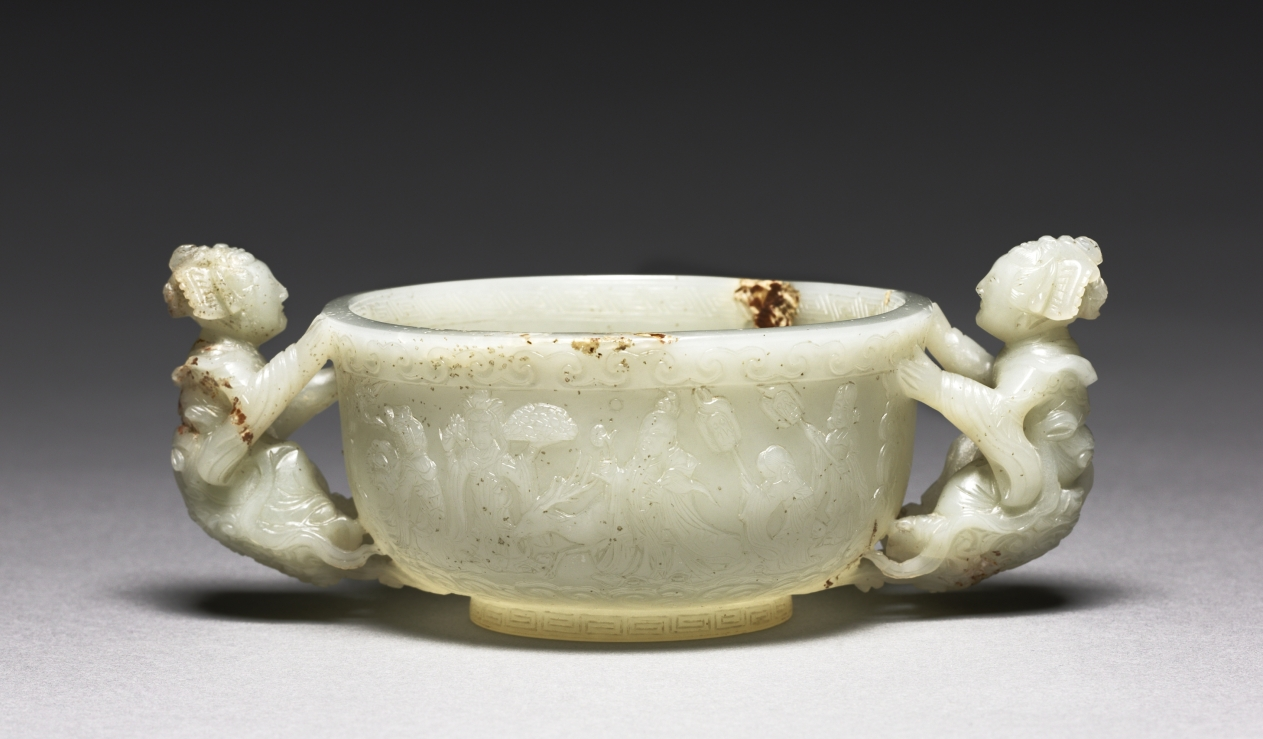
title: Cup with Daoist Figures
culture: China, Qing dynasty (1644–1911), Qianlong period (1736–95)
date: 1736–95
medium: Pale greenish-white jade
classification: Jade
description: During the Qing dynasty, Suzhou’s best products were sent north to the capital. Those that met imperial approval were sometimes graced with Qianlong’s mark, added by calligraphers and jade workers at court. The lack of a Qianlong mark on the Cleveland cup suggests that it might not have reached the court. Previously dated to the Yuan dynasty (1271–1368), new scholarship dates this cup to the Qing period.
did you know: Two female immortals serve as handles, while a Daoist procession with immortals, musicians, and attendants winds around the body of the cup.